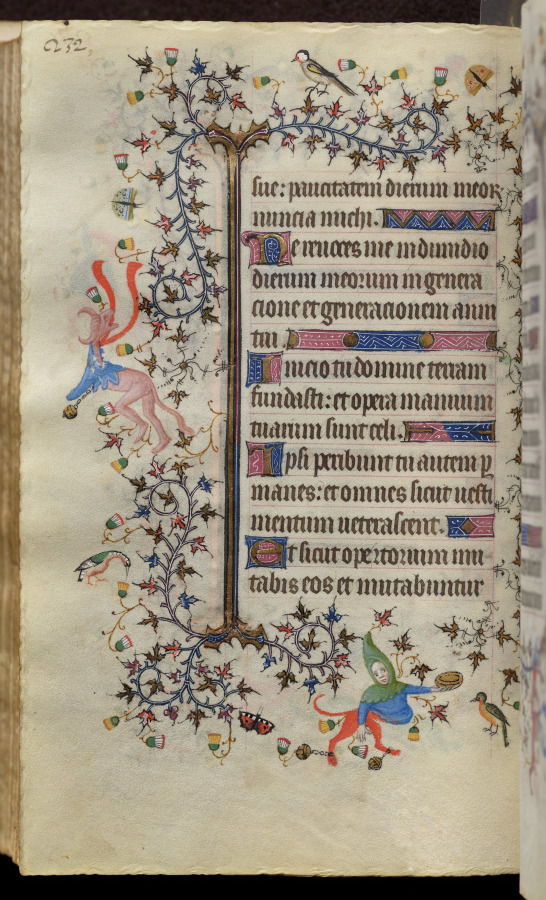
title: Hours of Charles the Noble, King of Navarre (1361-1425): fol. 116v, Text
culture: France, Paris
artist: Master of the Brussels Initials and Associates (French)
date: c. 1405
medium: ink, tempera, and gold on vellum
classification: Bound Volume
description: This precious volume was obviously highly prized by its owner, the French-born King of Navarre, who had his coat of arms painted on no less than twenty folios. Rather than directly commissioning this manuscript from a specific workshop, it seems that Charles the Noble acquired his book of hours -- perhaps ready-made for the luxury market -- while on a trip to Paris in 1404-05. A collaborative effort, six painting styles are evidenced within the pages of this codex, those of two Italians, two Frenchmen, and two Netherlanders. The painter who was responsible for the planning and decoration of the book, and who produced seventeen of the large miniatures, was a Bolognese artist known as the Master of the Brussels Initials. His principal assistant, responsible for most of the borders, was a Florentine who signed his name "Zecho" da Firenze on folio 208 verso.